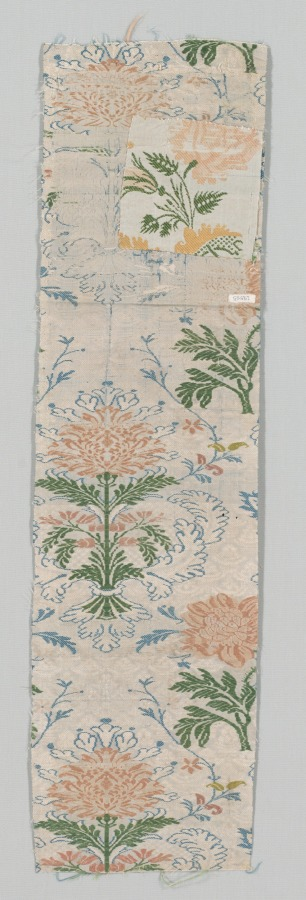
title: Fragments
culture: Italy, 17th century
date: 1600s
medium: brocade, silk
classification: Textile